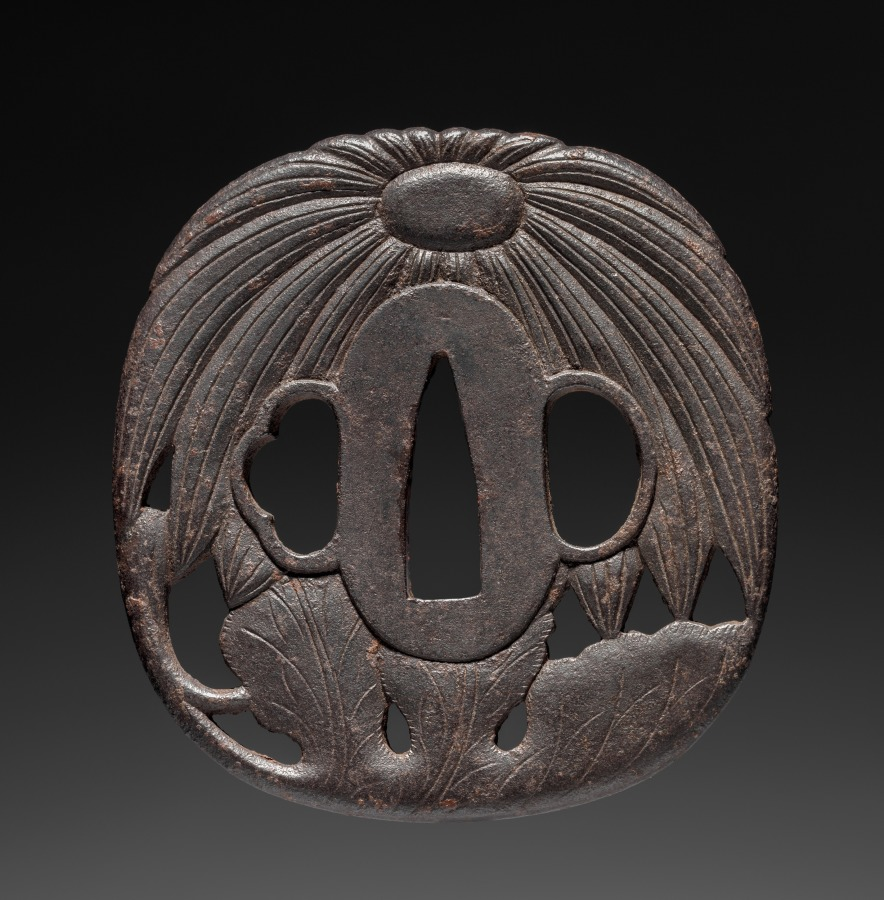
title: Sword Guard (Tsuba) with Chrysanthemum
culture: Japan, Edo period (1615–1868)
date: 1615–1868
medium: iron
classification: Arms and Armor